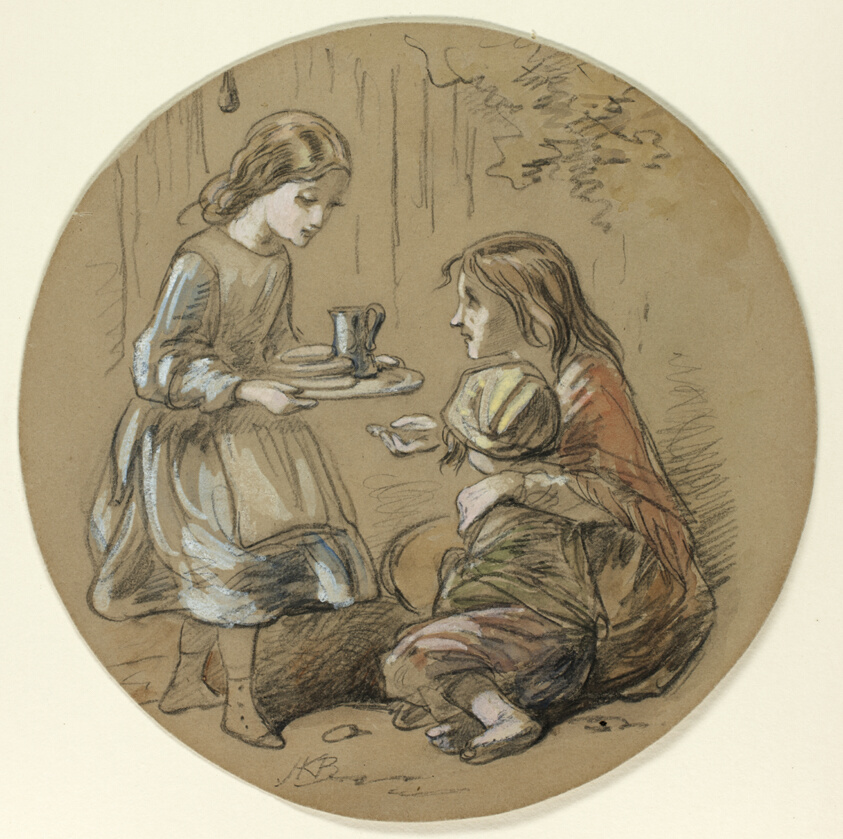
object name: Drawing and Watercolor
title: Girl Bringing Food to Poor Children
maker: Hablot Knight Browne (English, 1815-1882)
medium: Black crayon, with watercolor and gouache, on tan wove paper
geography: England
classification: watercolor; drawings (visual works); prints and drawing